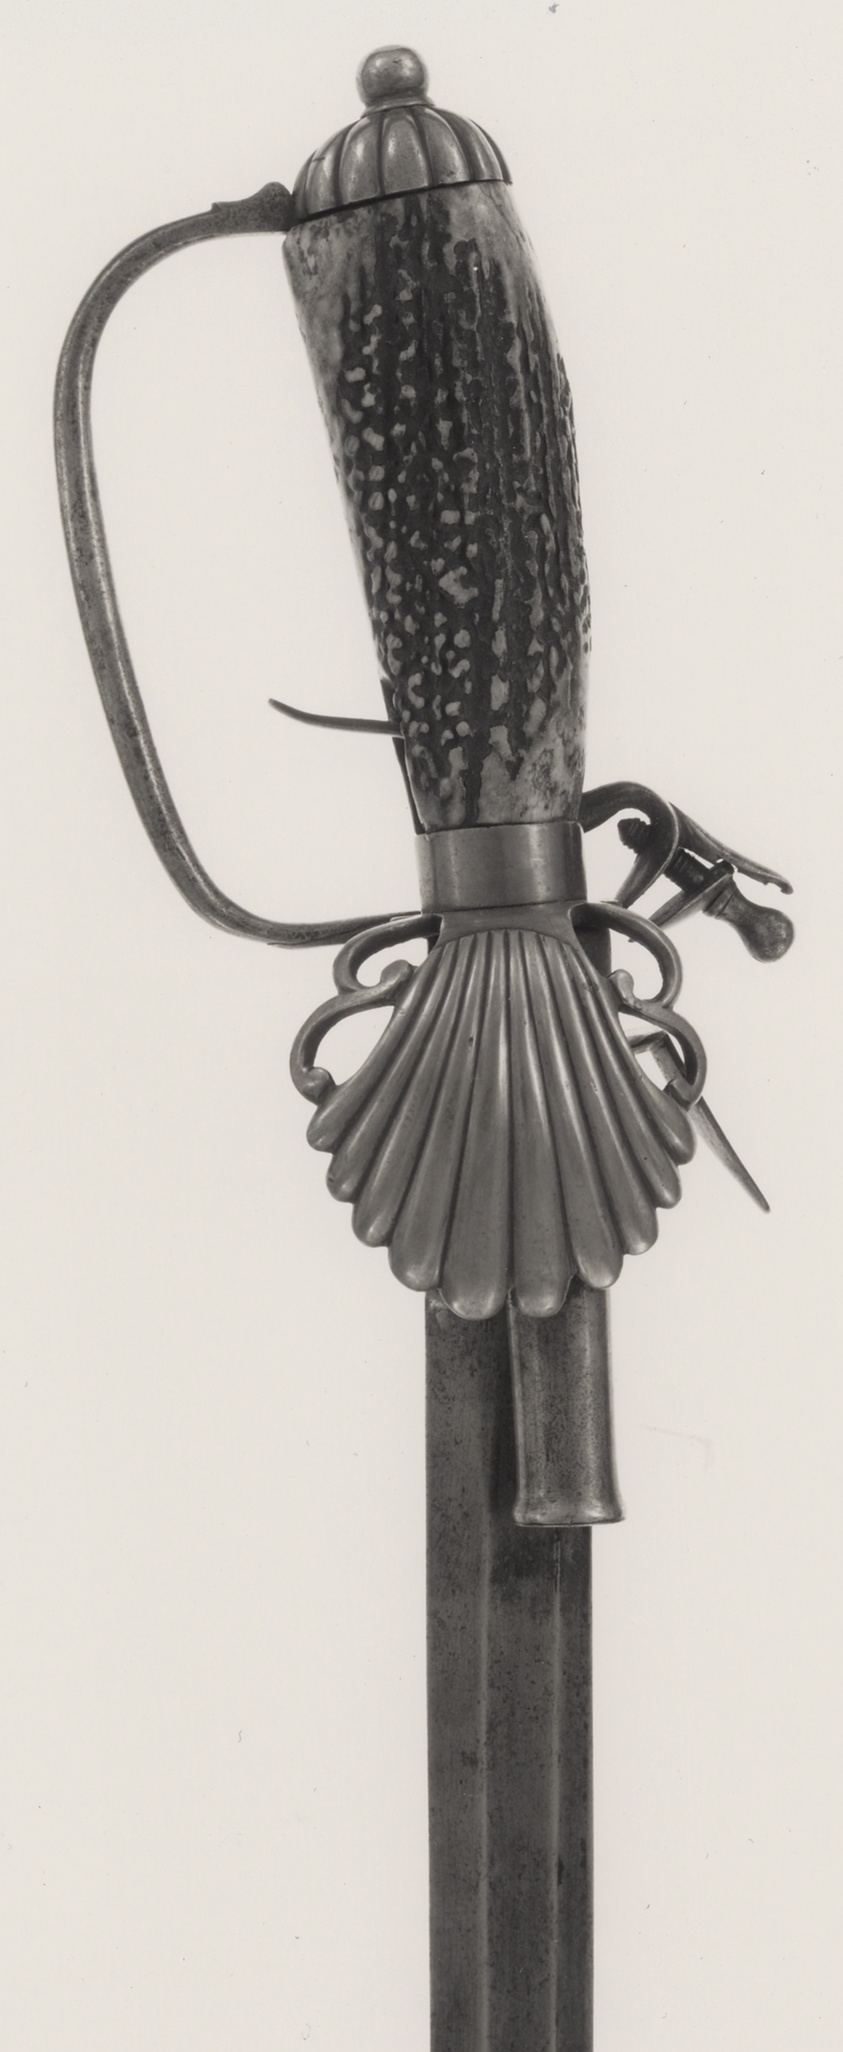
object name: Arms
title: Hunting Sword combined with Flintlock Pistol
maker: English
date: 1725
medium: Steel, brass, and horn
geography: England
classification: combination weapon; arms; arms and armor